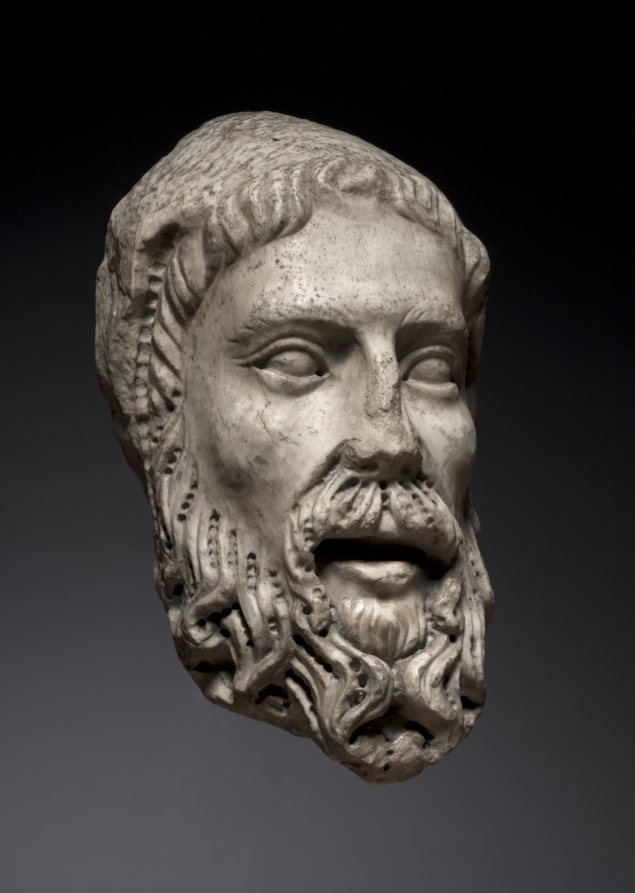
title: Head of a Prophet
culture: Italy, Siena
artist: workshop of Giovanni Pisano (Italian, c. 1240-c. 1320)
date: c. 1300–1325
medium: marble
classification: Sculpture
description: This head exhibits many of the characteristics of the style associated with the workshop of Giovanni Pisano. These are particularly noteworthy in the sensitive carving of the haunting face and its strikingly drilled beard. The head compares favorably to the sculpture made while Giovanni was master of works at Siena Cathedral (1285-97). Recent research suggests that it may once have belonged to a full-length Old Testament prophet looming on the exterior of Siena Cathedral.